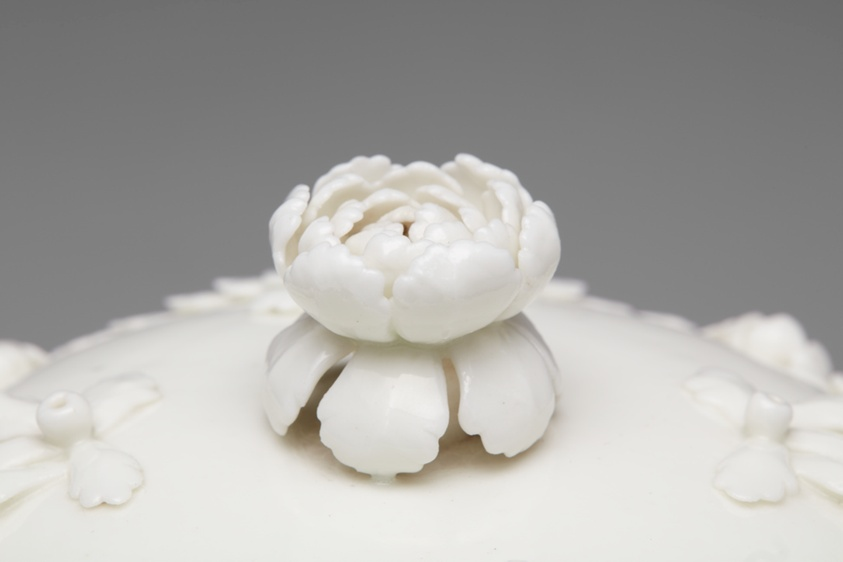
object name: Ceramics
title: Covered Bowl and Stand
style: Neoclassicism, 18th Century, Classical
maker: Mennecy Factory (France, 1750-73)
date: c. 1750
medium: Soft-paste porcelain and silver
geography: Mennecy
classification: mennecy; blanc de Chine; european decorative arts; porcelain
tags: sugar, sugar bowl, tea, tea service